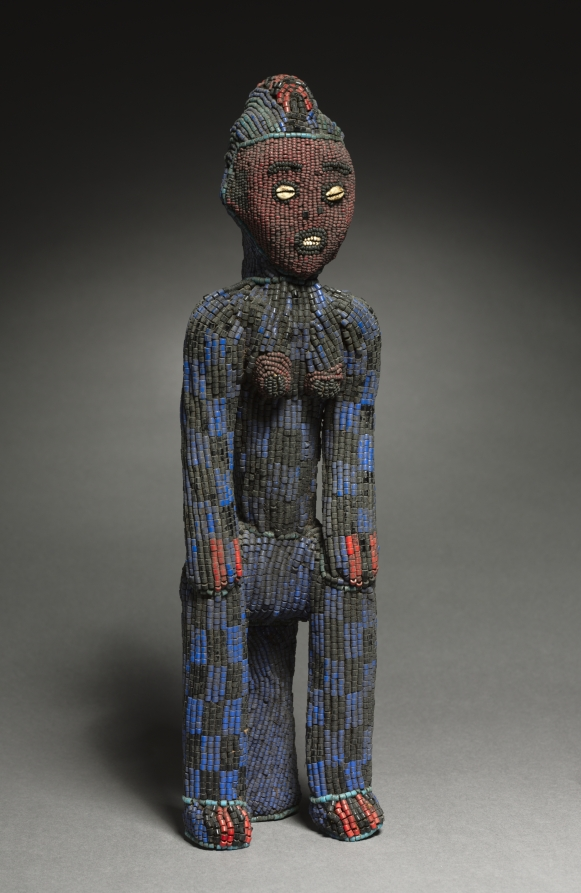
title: Figure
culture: Africa, Central Africa, Cameroon, Grassfields region, unidentified maker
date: 1900s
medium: Wood, glass beads, cloth, thread, and cowrie shells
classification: Sculpture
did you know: The beads on this sculpture were imported, likely from Venice or Bohemia (now called the Czech Republic).